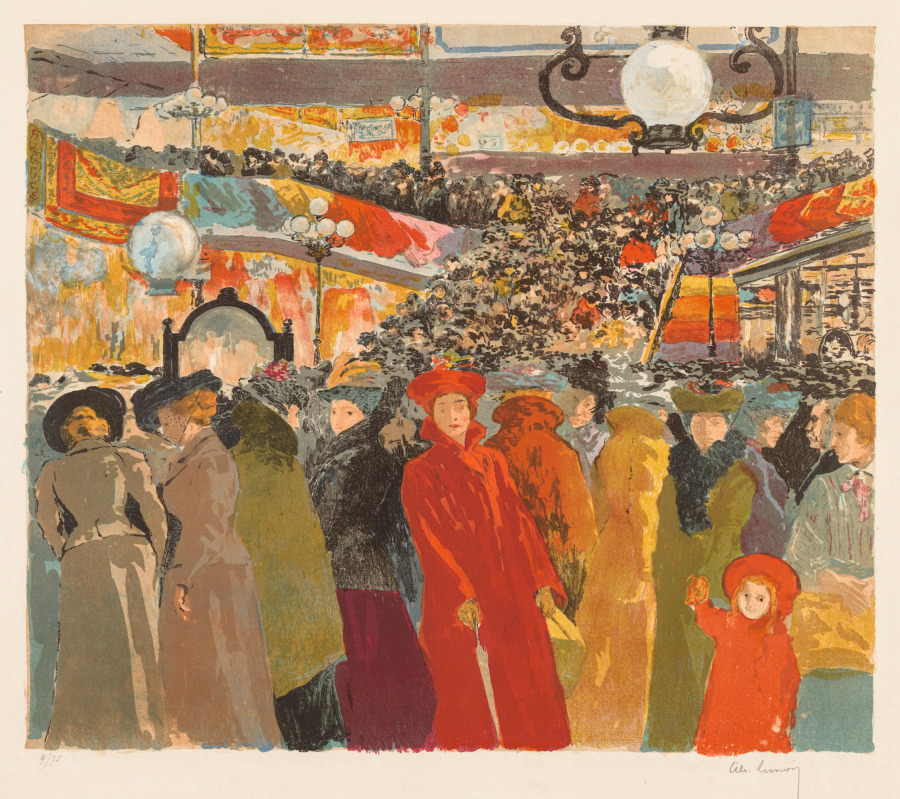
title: The Fancy Goods Store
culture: France, early 20th Century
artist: Alexandre Lunois (French, 1863–1916)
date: 1902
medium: color lithograph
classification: Print